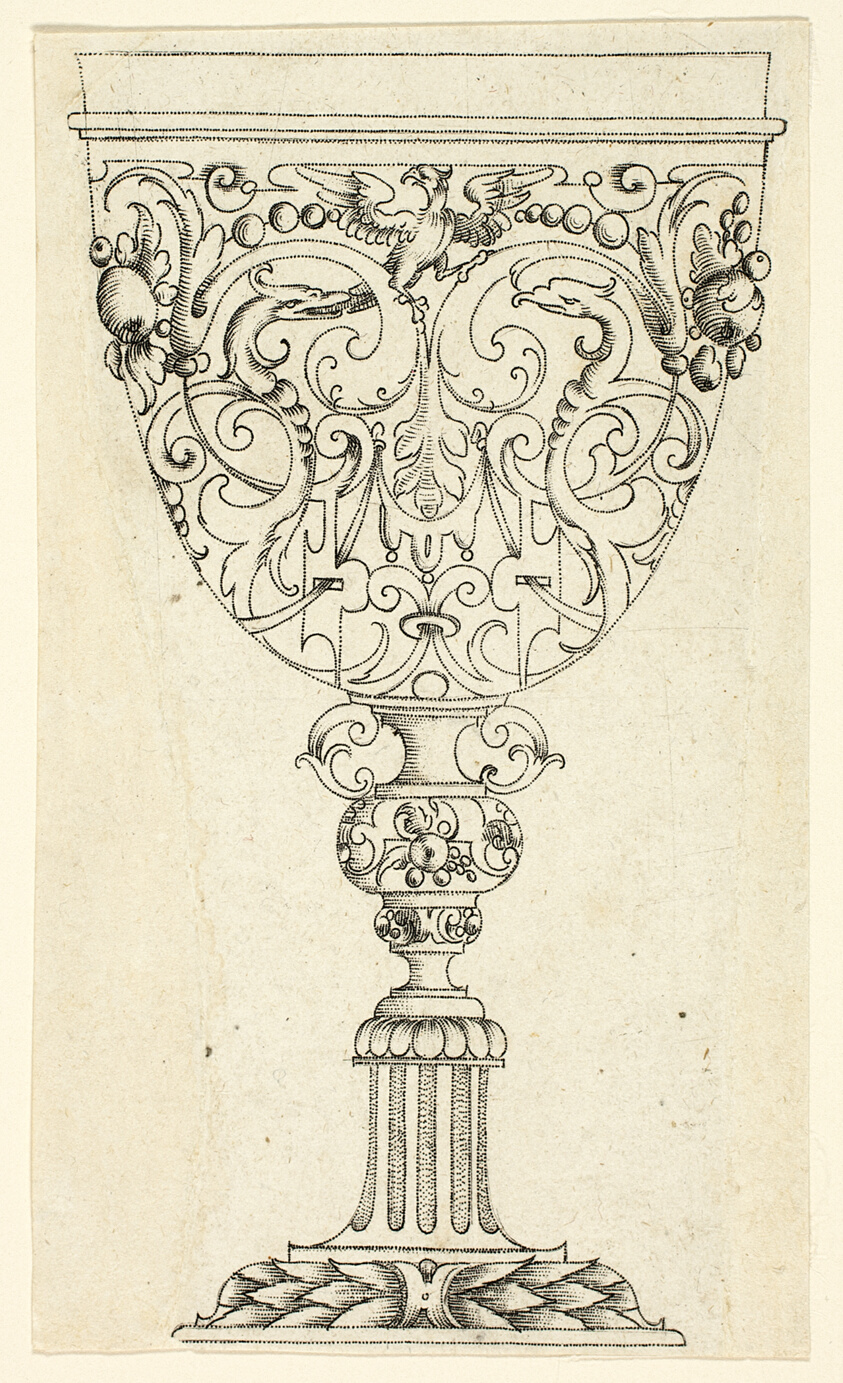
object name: Print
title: Small Drinking Goblet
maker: Paul Flindt (German, flourished 1592-1618)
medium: Dotted engraving on cream laid paper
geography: Germany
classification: engraving; print; prints and drawing